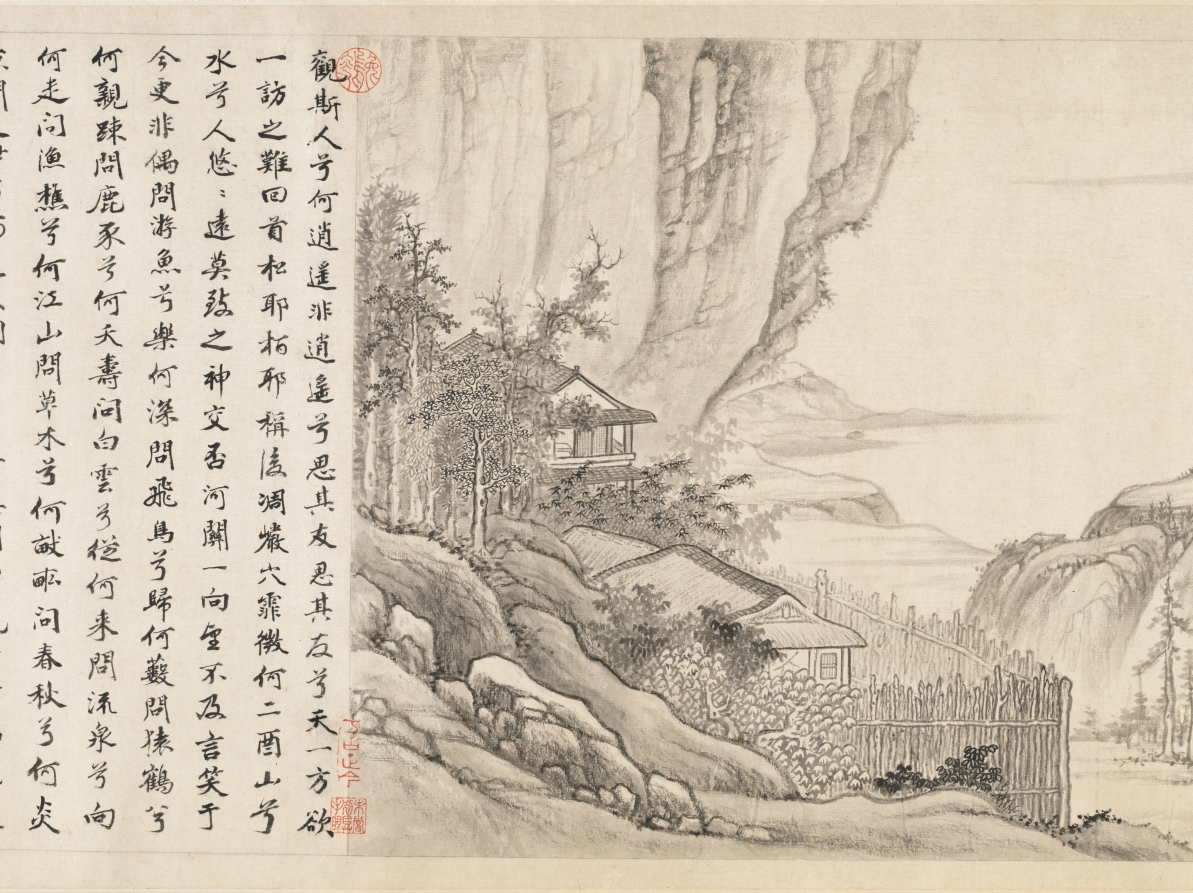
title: Meditative Visit to a Mountain Retreat: In Picture and in Words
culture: China, Ming dynasty (1368–1644)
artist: Xiang Shengmo (Chinese, 1597–1658)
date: 1648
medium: handscroll; ink on paper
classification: Painting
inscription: Artist's title and 3 seals (in front of painting): [title] Meditative Visit to a Mountain Retreat: In Picture and in Words 巖栖思訪圖詠 [3 seals] Tian lai ge zhong wen sun 天籟閣中文孫; Xiang shi kong zhang zui xin han mo 項氏孔彰醉心翰墨; Qing fu yuan zhong di yi miao ye 清福緣中第一妙業.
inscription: [印] 兔烏叟; 考古正今. 觀斯人兮何逍遙，非逍遙兮思其友。 思其友兮天一方，欲一訪之難回首。 松耶柏耶稱後凋，巖穴霏微何二酉。 山兮水兮人悠悠，遠莫致之神交否？ 河關一向望不及，言笑于今更非偶。 問游魚兮樂何深？問飛鳥兮歸何藪？ 問猿鶴兮何親疎？問鹿豕兮何夭壽？ 問白雲兮從何來？問流泉兮向何走？ 問漁樵兮何江山？問草木兮何畝畎？ 問春秋兮何炎涼？問世人兮何長久？ 問日月兮何晦明？曾見當時烏兔叟？ 戊子嘉平之初偶作此圖并題。 胥樵項聖謩識。 [印] 兔烏叟; 項氏孔彰; 未喪斯文.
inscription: 13 additional seals: 4 of Tang Zuomei 唐作梅 (late 18th–19th century); 3 of Zhang Baixi 張百熙 (1847–1907); 4 of Zhang Heng 張珩 (1915–1963); 2 unidentified.